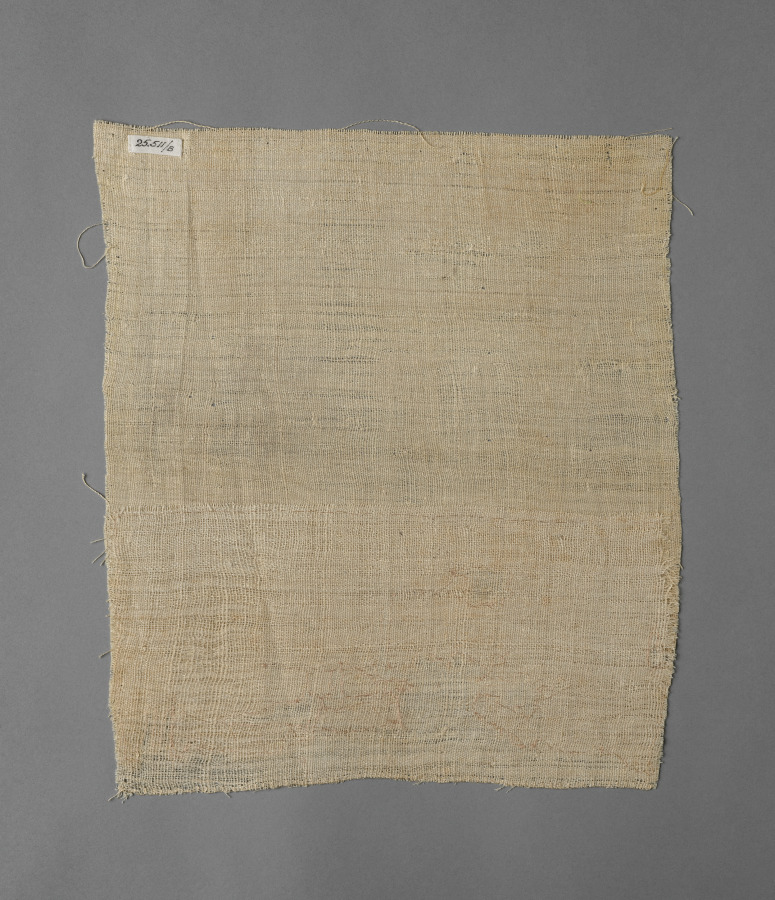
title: Mummy Linen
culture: Egypt, New Kingdom (1540–1069 BCE), Dynasty 18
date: 1550–1291 BCE?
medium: plain weave: linen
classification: Textile